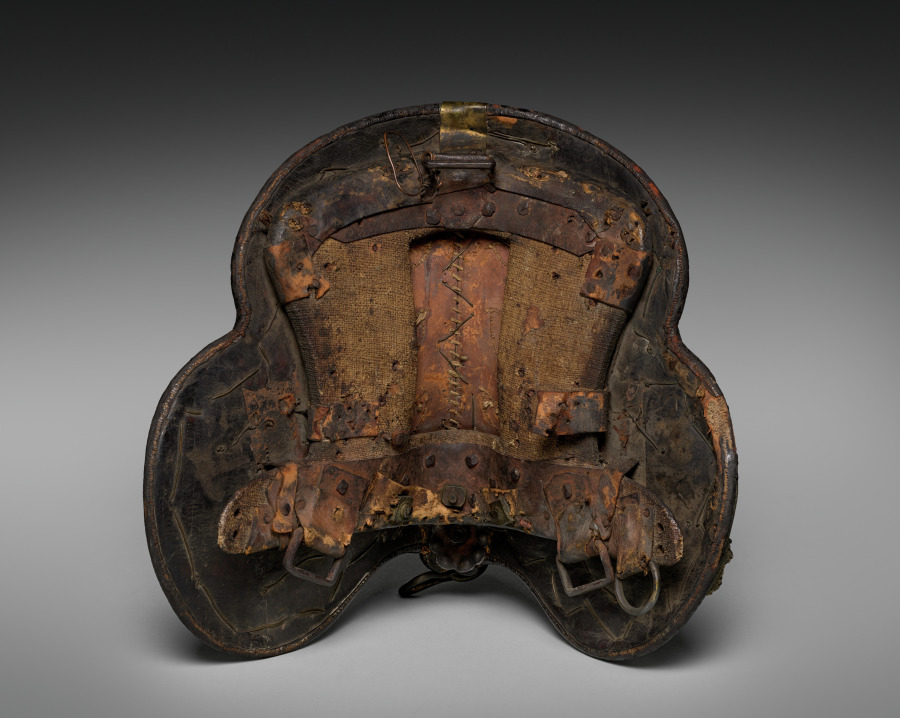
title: Child's Harness Saddle with Lion Pommel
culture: France, 17th century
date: 1600s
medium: leather, tooled with wood, canvas and steel on a brass frame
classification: Arms and Armor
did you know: This child-sized harness saddle was said to have been used in a riding school.